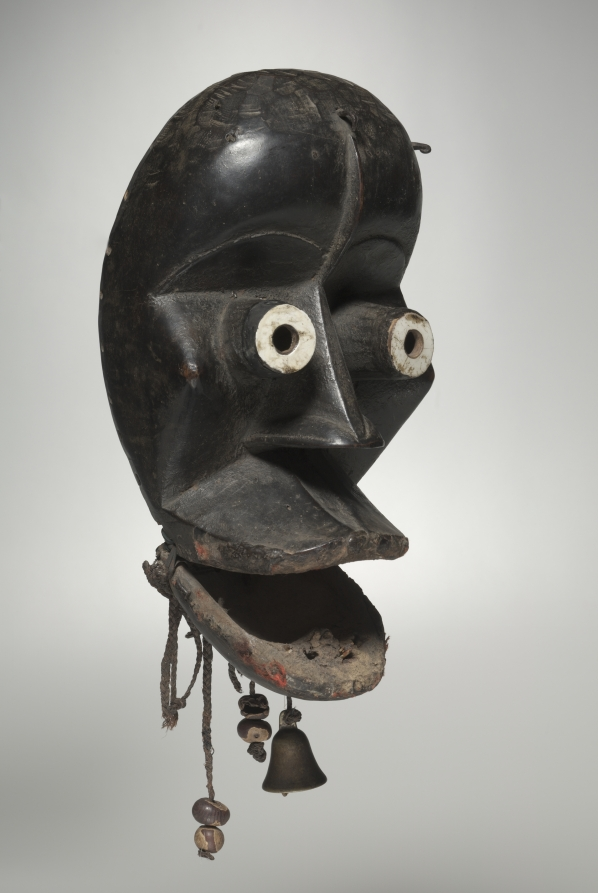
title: Mask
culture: Africa, West Africa, Liberia, Mano-style carver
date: early 1900s, before 1933–37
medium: Wood, copper alloy, plant fiber, cloth, rawhide or leather, teeth, seeds, resin, synthetic material, iron, and glass beads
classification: Mask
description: Generally, Mano masks are considered to be manifestations of forest spirits and can be grouped into 11 major types relating to aspects of social control, political and judicial matters, peacemaking, education, competition, and entertainment. This mask was acquired in Liberia by the medical missionary George Harley between 1933 and 1937.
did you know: The jaw of this mask is hinged, allowing it to open and close.